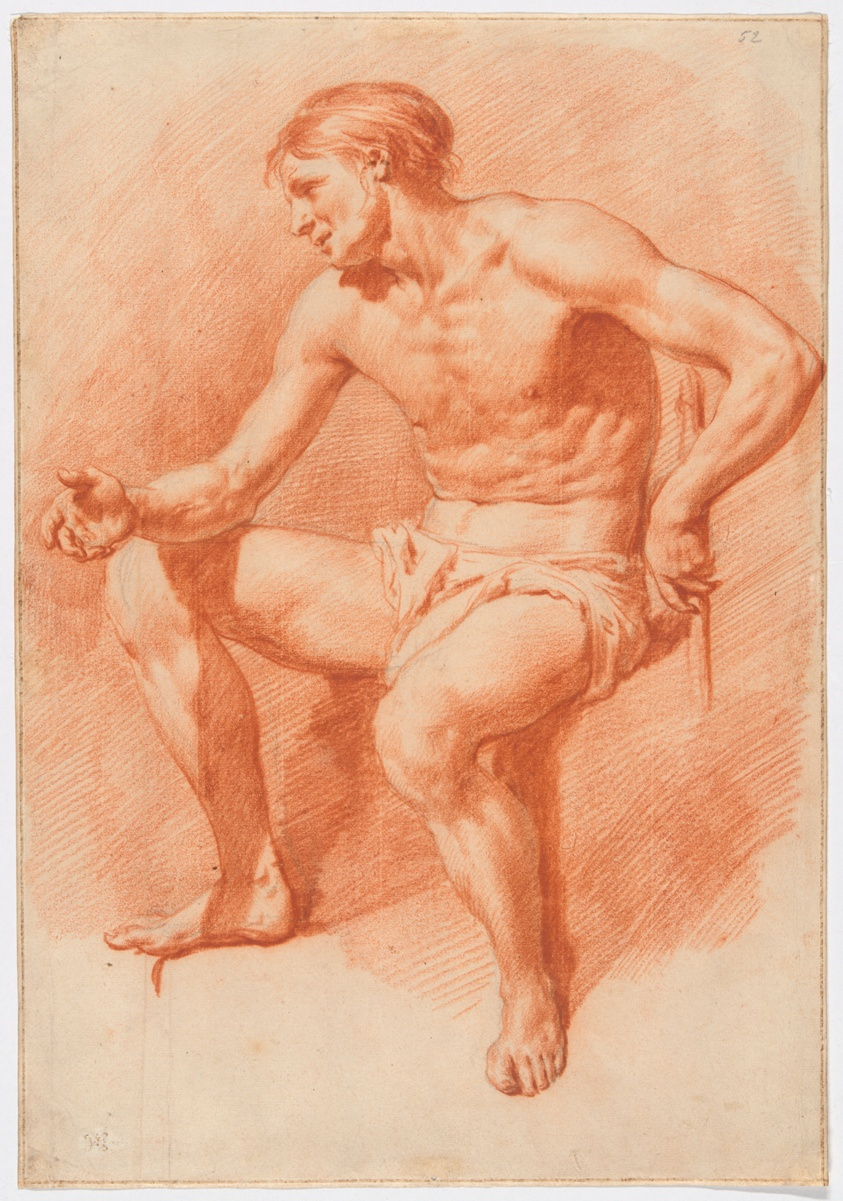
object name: Drawing and Watercolor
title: Study of a Male Nude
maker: Adriaen van de Velde (Dutch, 1636-1672)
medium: Red chalk, over traces of charcoal, ruled in pen and brown at edges, on cream laid paper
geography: Holland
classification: chalk; drawings (visual works); prints and drawing